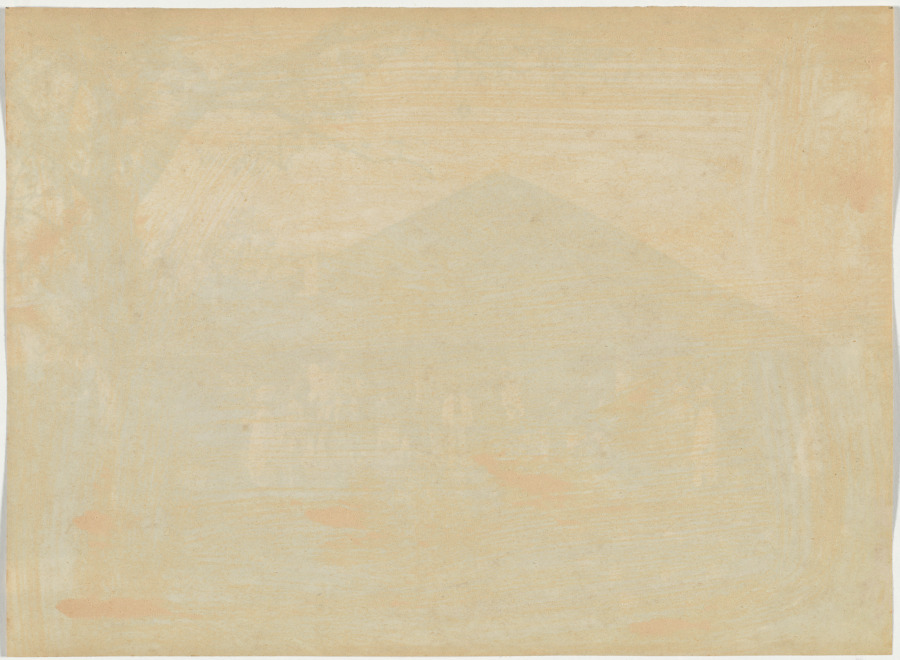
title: Reverend Loche at Neemuch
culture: India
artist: Raja Deen Dayal (Indian, 1844–1905)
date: 1887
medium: albumen print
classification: Photograph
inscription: No visible inscriptions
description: This building is a “dak bungalow,” one of the British government guesthouses that were central to the lives of British travelers in India. This network of houses offered places to eat, stay, rent fresh horses, and conduct business while traveling between residences. The bungalows’ wide latticed verandahs admitted breezes, kept out pests, and provided some privacy. The average British Indian military household had at least six servants; eleven Indian servants are shown here, including the only Indian woman pictured in this exhibition. Many images in this album show servants, but they are never mentioned in the captions.